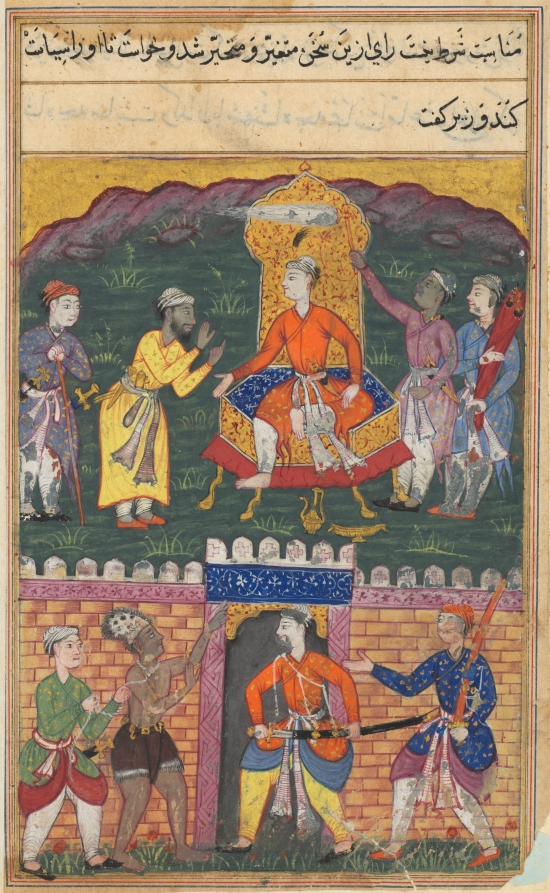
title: The vizier dissuades the king of Bahilistan from executing the dervish who asks for his daughter’s hand in marriage, from a Tuti-nama (Tales of a Parrot): Seventh Night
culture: Mughal India, court of Akbar (reigned 1556–1605)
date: c. 1560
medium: gum tempera, ink, and gold on paper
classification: Painting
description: A poor dervish, wearing a fur cap and short brown lower garment, stands captive before the furious king of Bahilistan. Before he can kill the dervish, a vizier reminds him that it is beneath a king to stain his sword with the blood of a mendicant. The dervish is ordered to prove his worth by offering the king’s daughter an elephant laden with gold.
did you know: Bahilistan was once an independent state in India.